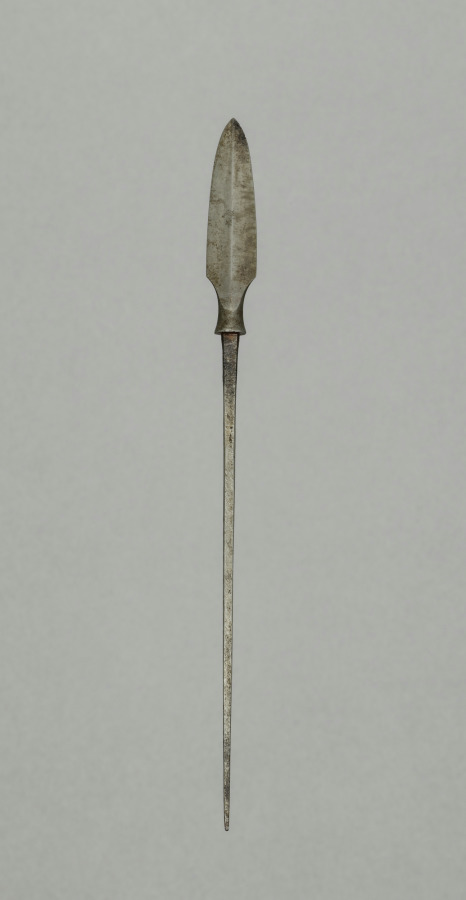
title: Arrow Point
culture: Japan, Edo period (1615–1868)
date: 1700s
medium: steel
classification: Arms and Armor